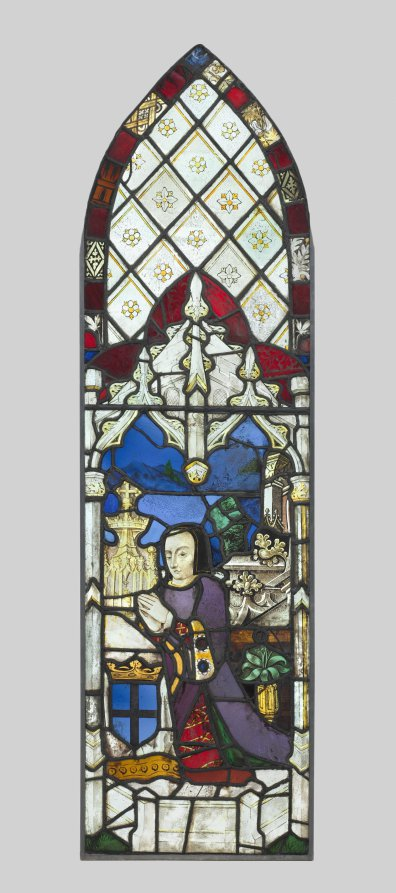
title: Stained Glass Panel with Female Donor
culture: France, 15th century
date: c. 1480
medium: pot metal, white glass with silver stain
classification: Glass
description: The origin of these stained glass panels is unknown. They depict a male and female donor, presumably husband and wife, who gaze upon a now-lost central panel. The object of their devotions was likely a crucified Christ or a standing figure of the Virgin Mary. The man, dressed in armor, and the woman, wearing a bejeweled and richly embroidered gown, are accompanied by their coats-of-arms (unidentified). They are undoubtedly members of an aristocratic elite who commissioned these windows, perhaps for a family chapel.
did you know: The brilliant colors of this stained glass panel were produced by adding different materials to molten glass, creating a reaction that resulted in specific colors. The metal supports for the individual pieces of glass are made from pot metal, an alloy, or mixture, of copper and iron.